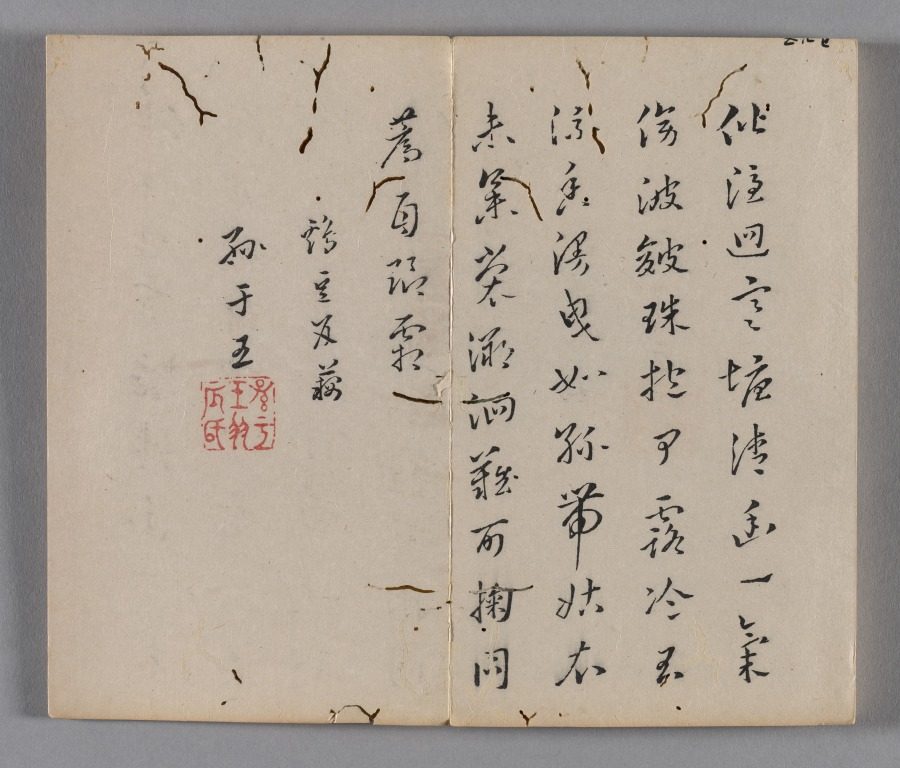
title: Ten Bamboo Studio Painting and Calligraphy Handbook (Shizhuzhai shuhua pu): Fruit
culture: China, Qing dynasty (1644-1911)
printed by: Hu Zhengyan (Chinese, c. 1584–1674)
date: 1633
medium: Woodblock-printed book; ink and colors on paper; first edition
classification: Print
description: Color printing reached a level of perfection in the early 1600s, as seen in this Ten Bamboo Studio Collection of Calligraphy and Painting and the Mustard Seed Garden Manual of Painting (printed 1679 and 1701). The painterly quality, precision in registering (aligning) the woodblocks, and harmonious colors made them the most successful color print editions in Chinese history. Both editions were printed and compiled in Nanjing, spread nationwide, and had a great impact on the arts in Japan and Korea.